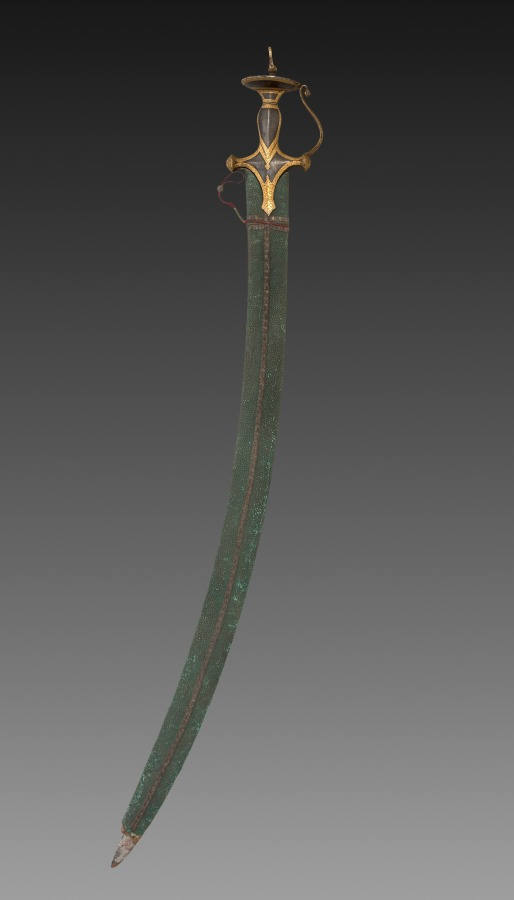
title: Silapa Sword with Green Leather Case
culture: India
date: 1700s–1800s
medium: gold with inlay and leather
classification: Arms and Armor